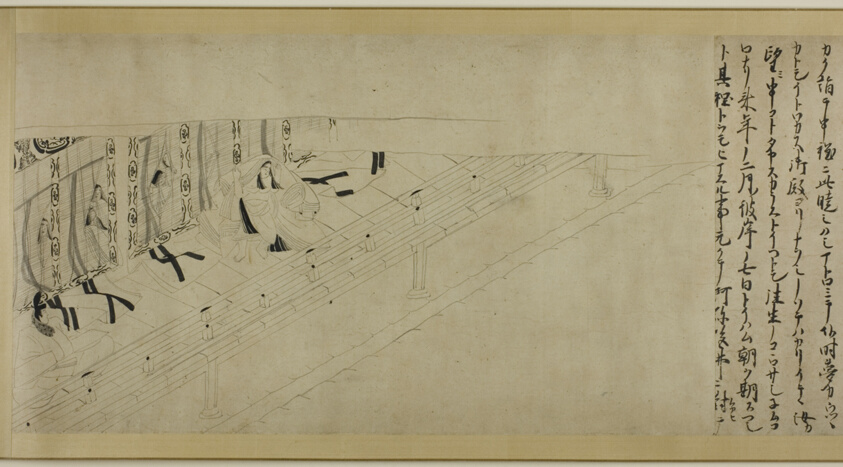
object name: Book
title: The Story of Sugawara no Michizane (Kitano Tenjin Emaki Dankan)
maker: Unknown Artist (Japanese, active in 14th century)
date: 14th century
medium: Handscroll; ink on paper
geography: Japan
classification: handscroll; painting; asian art